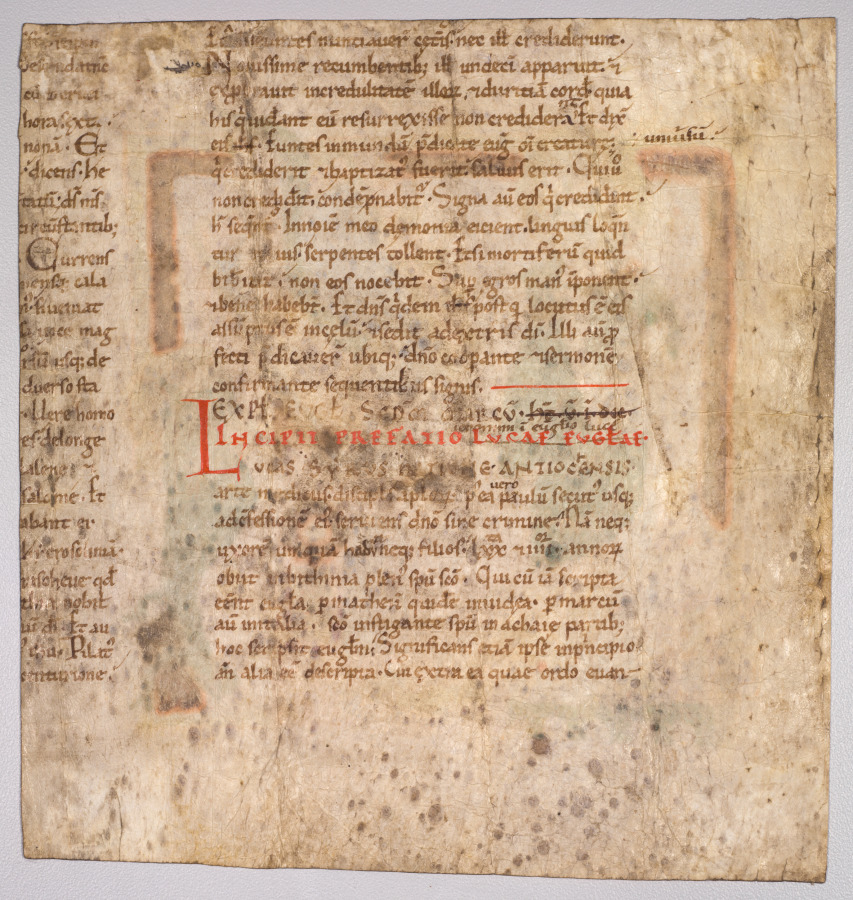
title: Miniature from a Latin Bible: Saint Luke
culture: France, Burgundy, Abbey of Cluny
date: c. 1100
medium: ink, tempera, and gold on vellum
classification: Manuscript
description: Inspired by Byzantine painting, this rare miniature represents the last surviving fragment of a once magnificent bible. The fundamental text of every medieval monastery was the Latin Bible. Monastic bibles at this time were usually large, cumbersome books (commonly in two or three volumes) designed to be recited from a lectern-rather than for private study. This exquisite miniature was excised from such a bible and introduces the beginning of the Gospel of St. Luke. Undoubtedly copied and painted in the scriptorium at Cluny, the bible may have been influenced by a manuscript carried to Cluny from Byzantium, or else may represent the work of an Italian artist working at Cluny but acquainted with Byzantine modes of painting. A large monastery such as Cluny probably had up to a dozen copyists continuously producing such manuscripts. A surviving 12th-century booklist records that Cluny possessed some 570 volumes, a large number for the time.